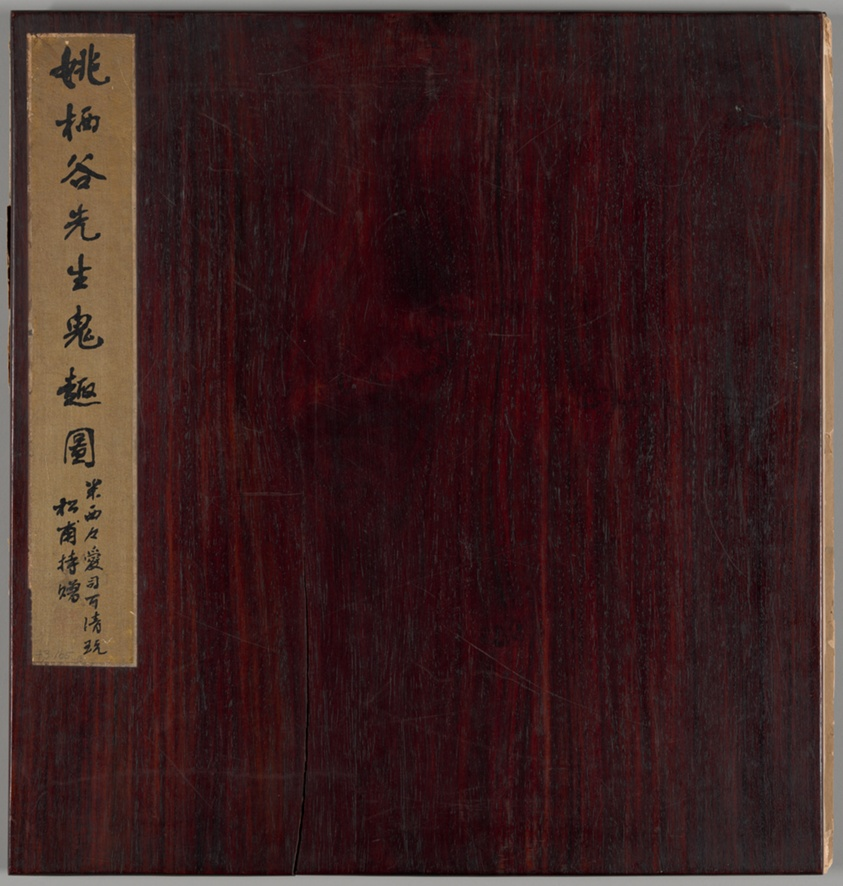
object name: Painting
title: Ghosts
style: Chinese (culture or style)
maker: Yao Luan 姚鑾 (Chinese, 19th century)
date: Qing dynasty (1644–1911), 1893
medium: Album of twelve leaves; ink on paper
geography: China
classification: album leaf; painting; asian art